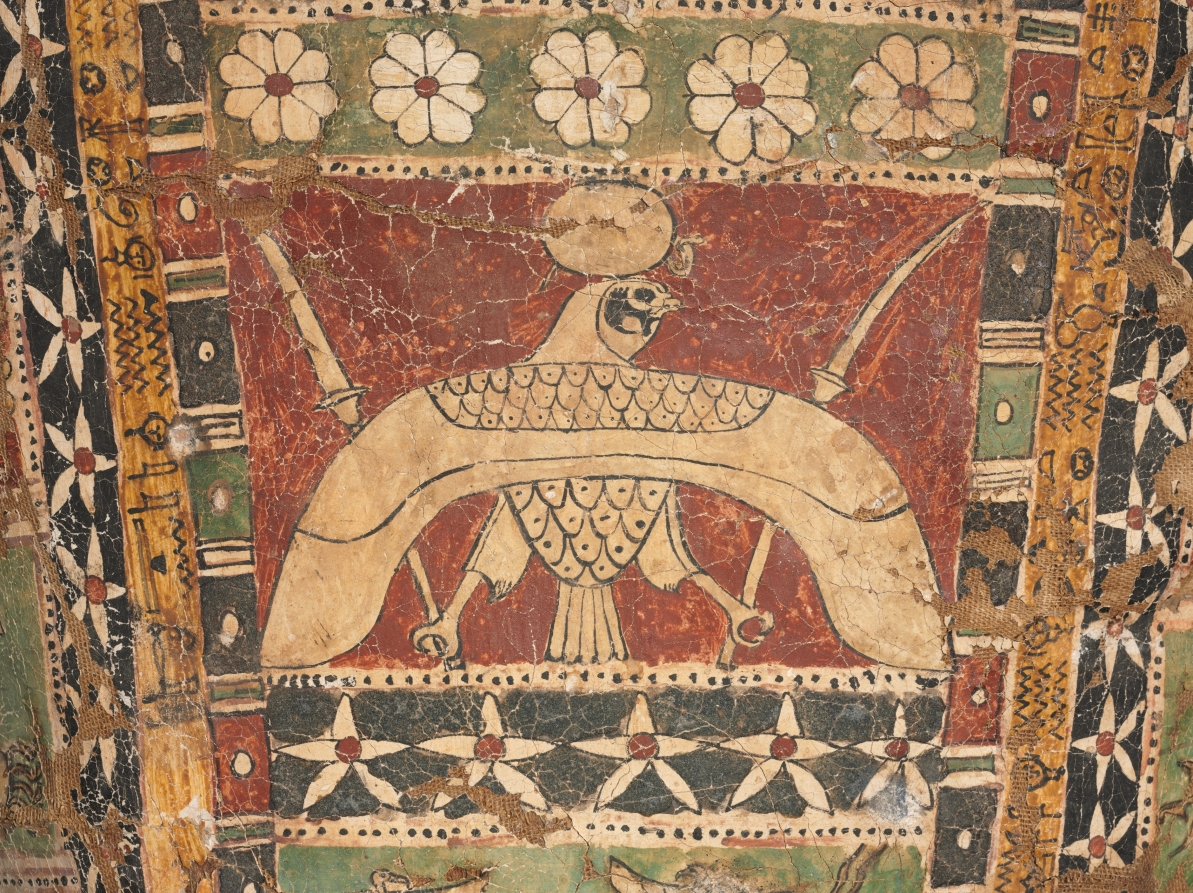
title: Cartonnage Mummy Case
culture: Egypt, Greco-Roman period (332 BCE–395 CE), Ptolemaic dynasty (305–30 BCE)–Roman empire (30 BCE–395 CE)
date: c. 50 BCE–50 CE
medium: cartonnage, painted and gilded, with glass inlays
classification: Funerary Equipment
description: This mummy case is made of cartonnage, a material similar to papier-mâché, but using layers of linen rather than paper. Cartonnage mummy cases such as these are contemporary with funerary portraits painted on wood or linen, although they present a very different appearance. The face, modeled in plaster, is bland and idealized, although the effect of the gilding and glass inlays is quite dazzling. The body is painted with traditional, age-old funerary motifs: the god Osiris, seated and mummiform; the fetish of Abydos, holy city of Osiris, flanked by standing deities (Thoth and Shu); a Horus falcon with outspread wings, and the bark of Sokar. Below these are the sandaled feet of the deceased. On the sides are rows of seated deities. On the top of the head are a winged scarab beetle flanked by Anubis jackals. On the foot are painted the soles of the deceased’s sandals, flanked by scorpions for protection.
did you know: This coffin is smaller and later in date than the other coffins in this gallery. It is made of cartonnage, which used layers of linen to create a material similar to papier-mâché. The painted portrait head displays the influence of Roman portraiture at this time and incorporates both gilding and glass inlays. Despite the fragile materials, this mummy case survived due to the very dry desert climate in which it was found.